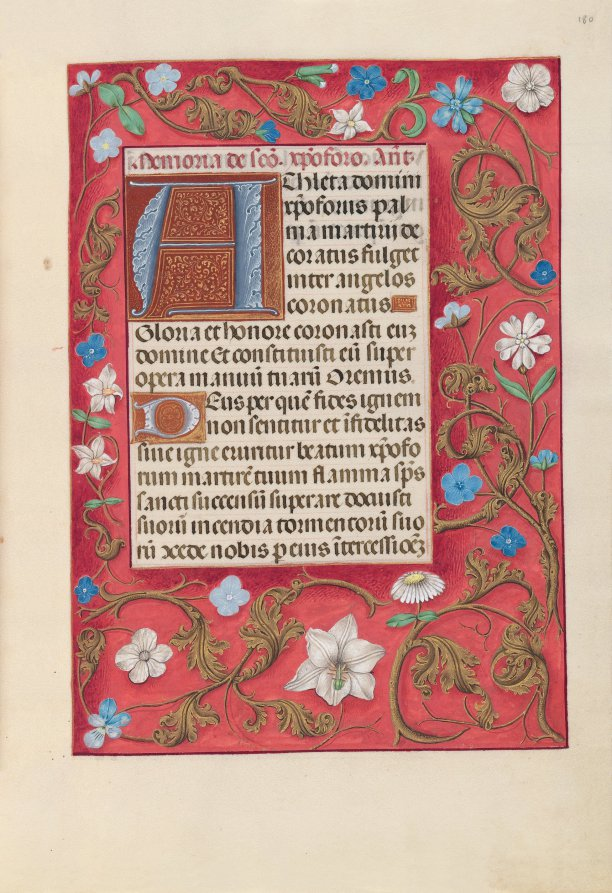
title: Hours of Queen Isabella the Catholic, Queen of Spain: Fol. 180r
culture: Flanders, Ghent and Bruges, late 15th century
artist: Master of the First Prayerbook of Maximillian (Flemish, c. 1444–1519)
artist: and Associates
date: c. 1500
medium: ink, tempera, and gold on vellum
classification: Bound Volume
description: This manuscript was illuminated by a circle of at least five highly organized manuscript painters active in the Flemish cities of Ghent and Bruges. The principal illuminator was Alexander Bening, who painted the majority of the book's miniatures. Manuscripts produced by this circle of artists are renowned for the decoration of their borders, which typically feature a rich variety of realistically-painted flowers, birds, and butterflies. This prayer book, called a book of hours, was intended not for a cleric, but for the private devotions of a lay person-in this case, Isabella the Catholic, Queen of Spain (1451-1504). Isabella's coat of arms embellishes the book's frontispiece. It is unlikely that the book was commissioned by the Queen herself; rather, she probably received it as a diplomatic gift from someone courting her patronage, perhaps Cardinal Francisco Jimenez de Cisneros. A Franciscan friar, Jimenez was dependent upon Isabella for his advancement, first to the post of Queen's confessor in 1492, and then to Archbishop of Toledo in 1495.